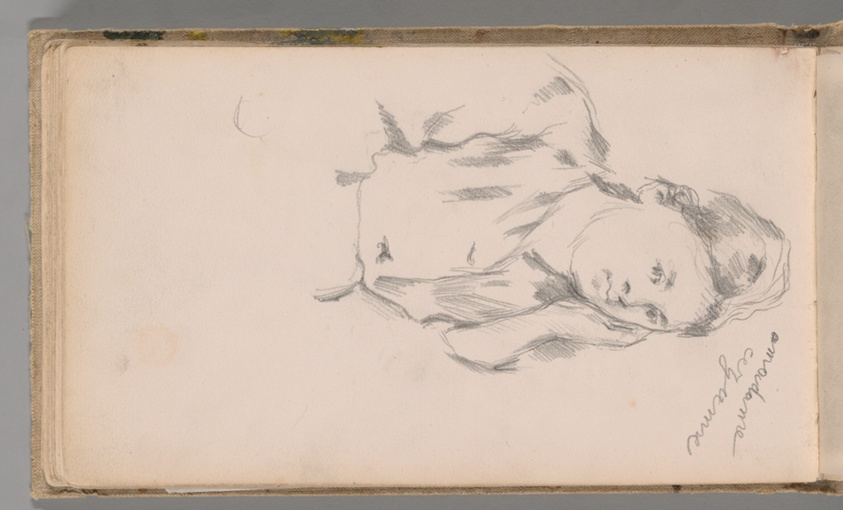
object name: Drawing and Watercolor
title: Sketchbook No. 2 (L'Estaque)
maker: Paul Cézanne; French, 1839-1906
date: 1875–86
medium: Graphite and pen and ink drawings on paper, bound into a book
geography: France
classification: sketchbook; graphite; prints and drawing; paper